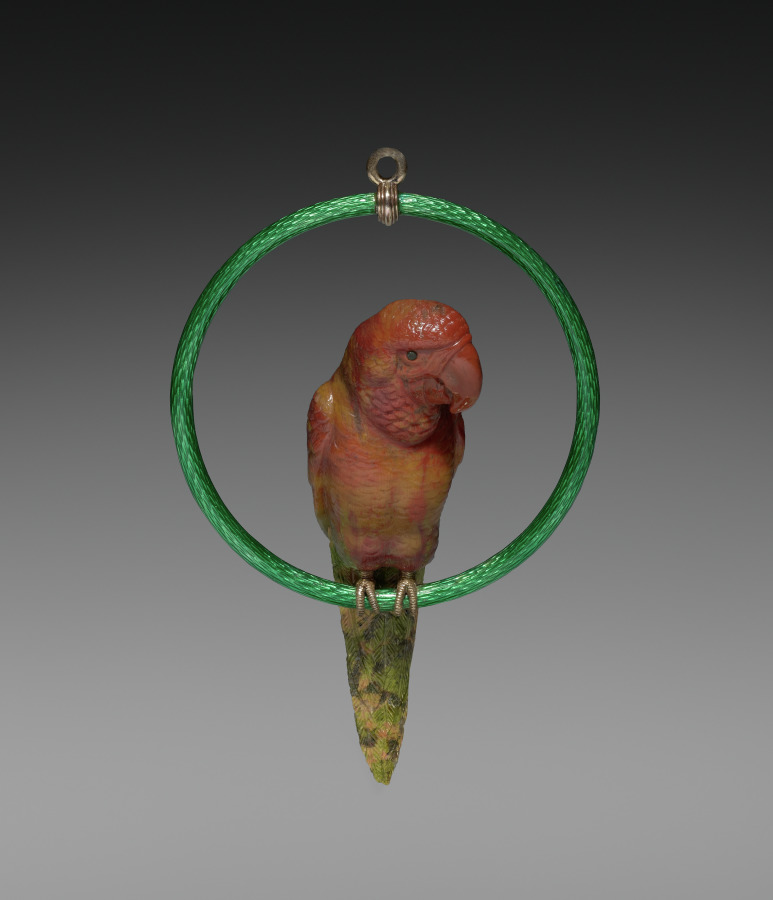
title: Parrot from the Parrot on a Perch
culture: Russia, St. Petersburg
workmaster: Mikhail Evlampievich Perkhin (Russian, 1860–1903)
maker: House of Fabergé (Russian, 1842–1918)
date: 1896–1903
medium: jasper, agate, emeralds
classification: Miscellaneous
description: In creating luxurious accessories for a desk or tabletop, Fabergé often used native hardstones such as multicolored agate and jasper, green nephrite, pink rhodonite, and rock crystal found in the Ural Mountains of western Russia. By paying careful attention to the unique colors and textures of the stones, Fabergé and his craftsmen brought them to life, turning milky agate into a begging poodle or green and black jasper into this parrot. The use of native materials also promoted Russian nationalism, which appealed greatly to the tsar and his family.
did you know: This parrot is part of a figure that includes a perch for the bird to sit upon.